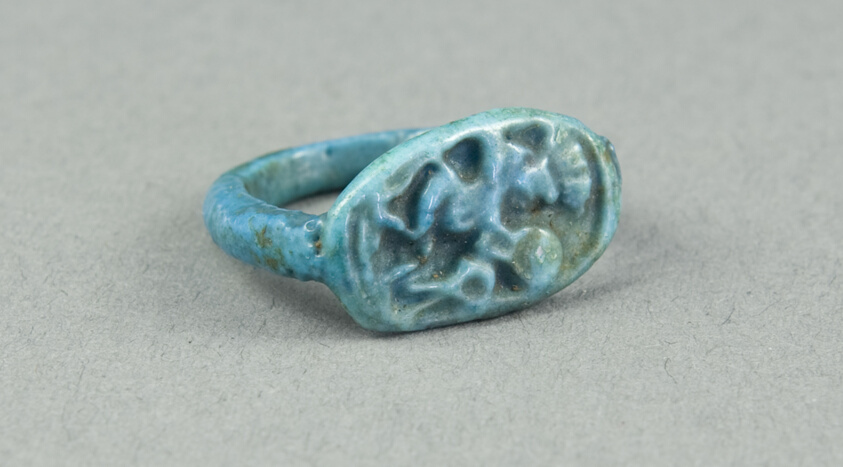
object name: Costume and Accessories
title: Ring: Figure of Bes playing frame drum, sa (protection) before him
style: egyptian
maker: Egyptian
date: New Kingdom, Dynasty 18 (about 1390 BCE)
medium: Faience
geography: Egypt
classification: ring (jewelry); ceramics; jewelry; ancient art; costume; faïence (composite material)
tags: goddesses